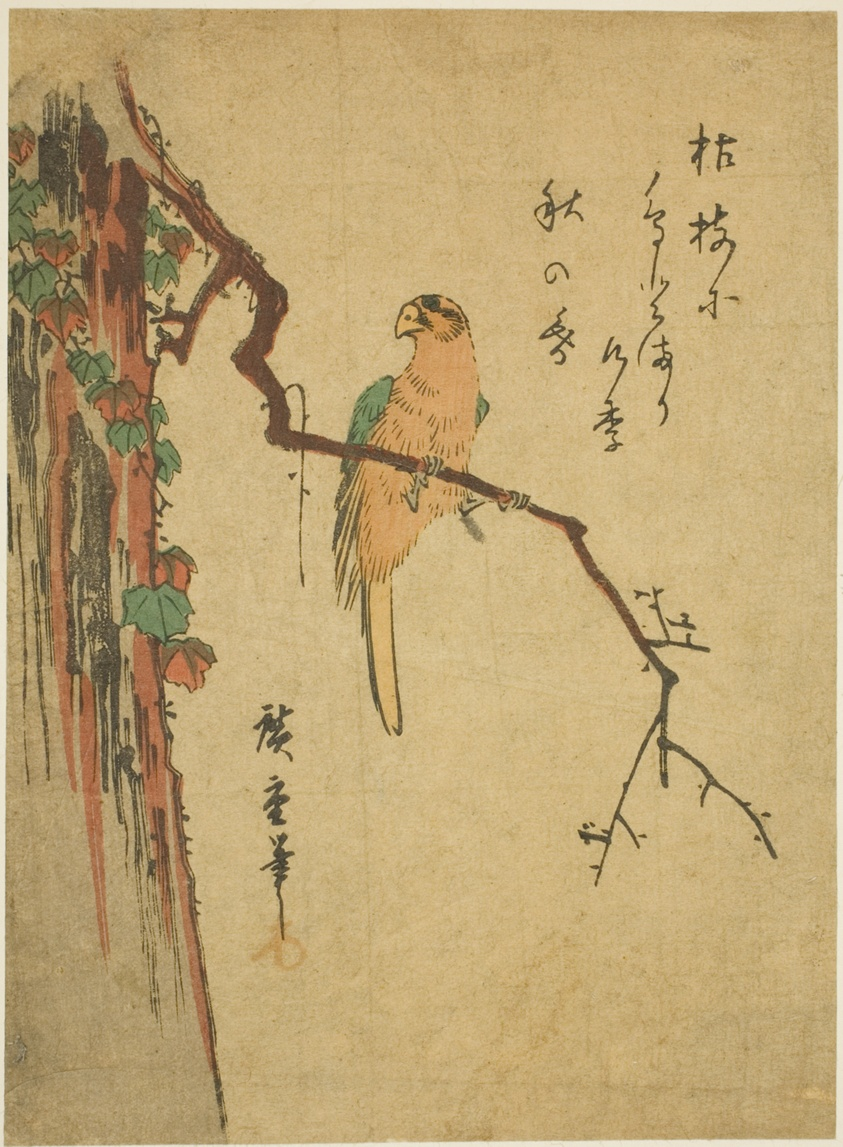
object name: Print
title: Macaw on ivy-covered tree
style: Japanese (culture or style)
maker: Utagawa Hiroshige 歌川 広重; Japanese, 1797-1858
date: 1830s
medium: Color woodblock print; chuban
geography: Japan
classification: woodblock print; print; asian art